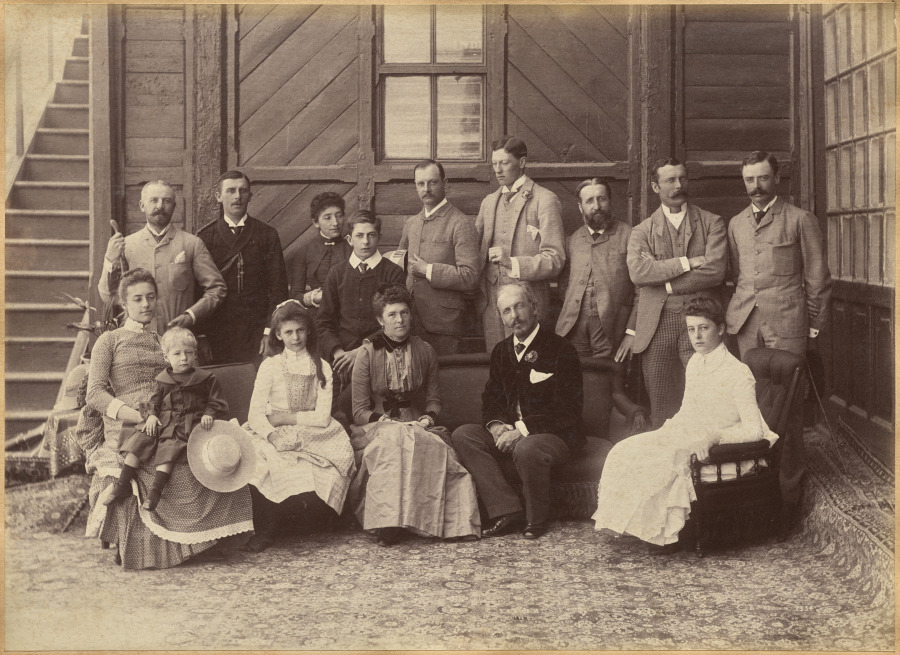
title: Viceregal Party Shimla (verso)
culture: India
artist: Raja Deen Dayal (Indian, 1844–1905)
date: 1887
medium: albumen print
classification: Photograph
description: These photographs are part of an album, now disassembled, of around 105 photographs taken in India between 1885 and summer 1887 that provide glimpses into the lives of the British colonial elite and royal and upper-class Indians. The museum holds another group of 37 pictures from this album (2016.266), which was probably commissioned by a British civil servant visiting or working in India around 1888 as a personal souvenir of his experiences there.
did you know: Raja Deen Dayal is regarded now, and was considered during his lifetime, to be India’s most important 19th-century photographer.